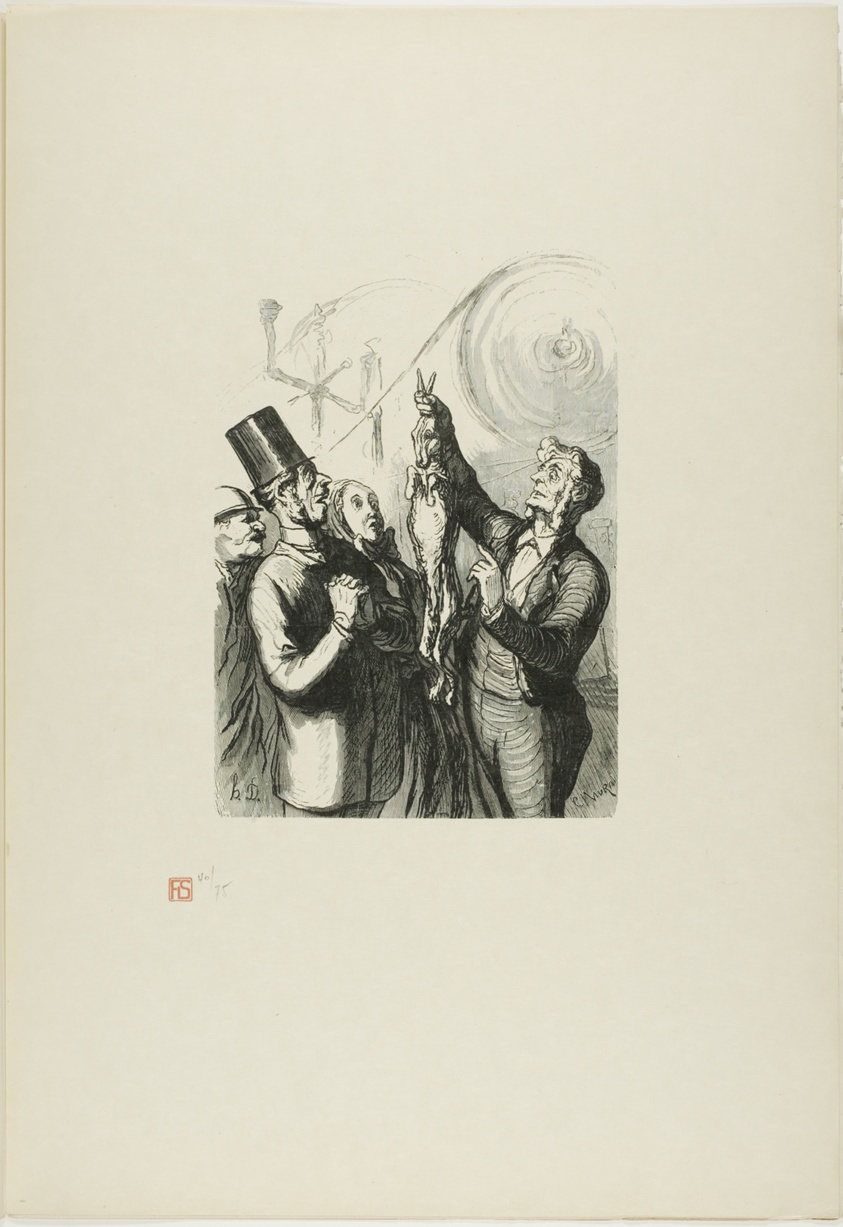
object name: Print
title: At the Universal Exhibition: The producer of felt hats. Here you can see a live rabbit, which I will dump into the machine like that…..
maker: Charles Maurand (French, 1824-1904); after Honoré Victorin Daumier (French, 1808-1879); printed by François Louis Schmied (Swiss, 1873-1941); published by Jules Meynial (French, 20th century)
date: 1867, printed 1920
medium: Wood engraving on cream Japanese paper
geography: France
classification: wood engraving; print; prints and drawing